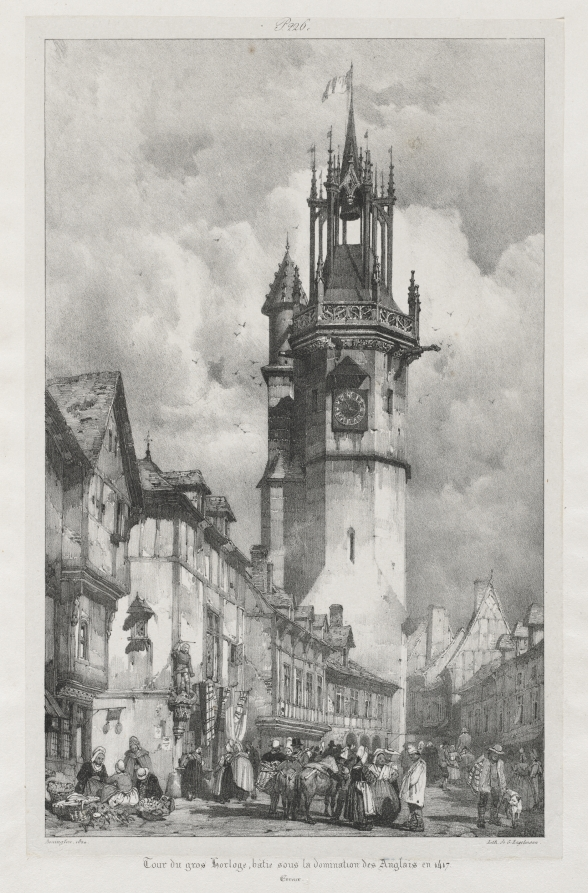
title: Voyages pittoresques et romantiques dans l'ancienne France, Normandie: Tour du Gros-Horloge, Evreux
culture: France, 19th century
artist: Richard Parkes Bonington (British, 1802–1828)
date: 1824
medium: lithograph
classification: Print